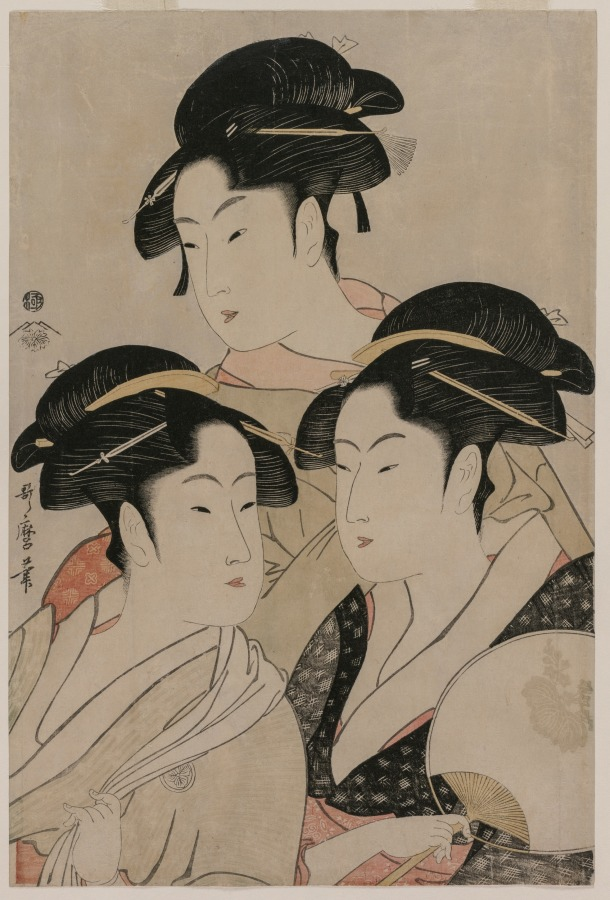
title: Tomimoto Toyohina, Takashimaya Ohisa, and Naniwaya Okita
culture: Japan, Edo period (1615–1868)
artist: Kitagawa Utamaro (Japanese, c. 1754–1806)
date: c. 1794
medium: color woodblock print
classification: Print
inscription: Artist's signature: Utamaro hitsu.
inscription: Publisher: Tsutaya Jūzaburō (emblem). Censorship Seal: kiwame.